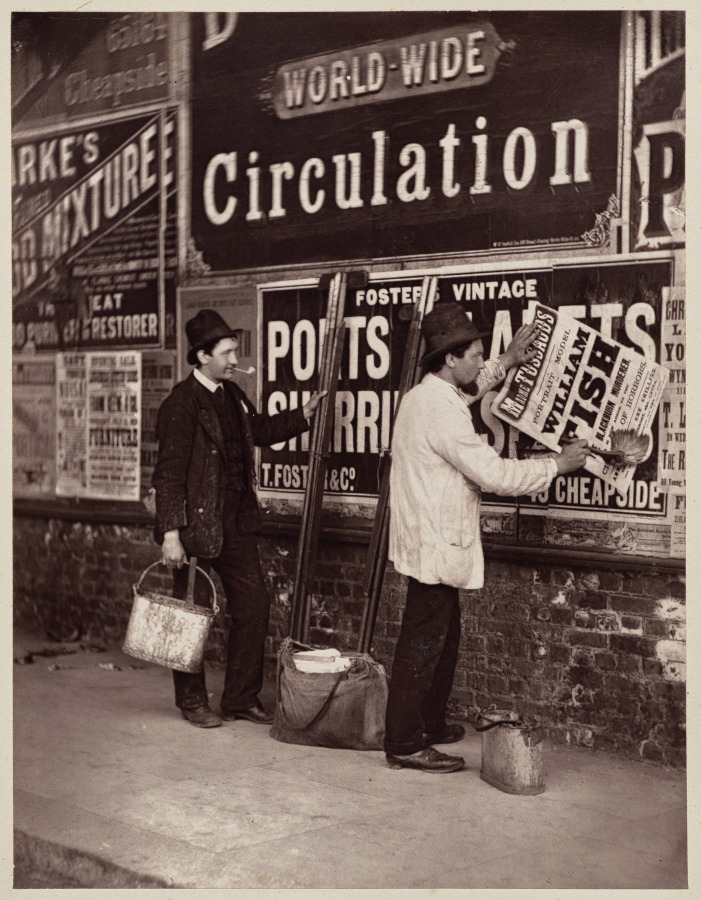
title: Street Advertising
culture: England, 19th century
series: Street Life in London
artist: John Thomson (British, 1837–1921)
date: 1876–77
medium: woodburytype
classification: Photograph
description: The poster being pasted up by the two men in the late 1870s is an ad for Mme. Tussaud’s London, a museum of wax figures that is still in business today. The image was part of John Thomson’s publication Street Life in London, a group of essays and photographsthat was one of the first published compilations of social documentary photographs. It holds a place of honor in the histories of photography, the book, ethnology, and sociology.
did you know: Mme. Tussaud’s wax museum in London was founded in 1835.